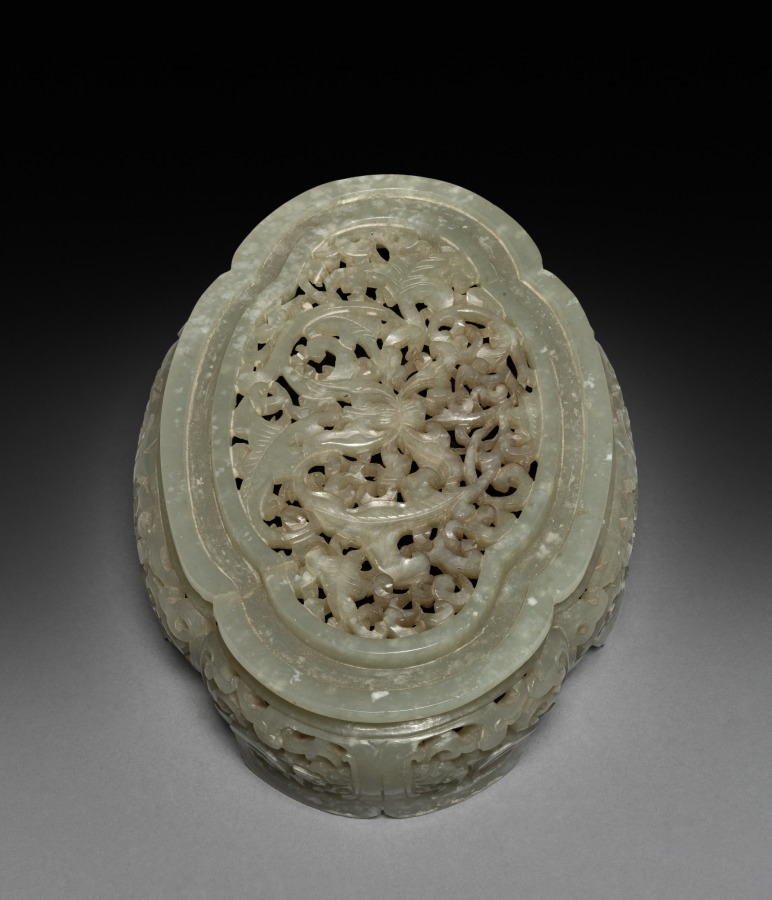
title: Oval Stand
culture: China, Qing dynasty (1644–1911), Qianlong reign (1736–95)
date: 1700s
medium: jade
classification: Jade